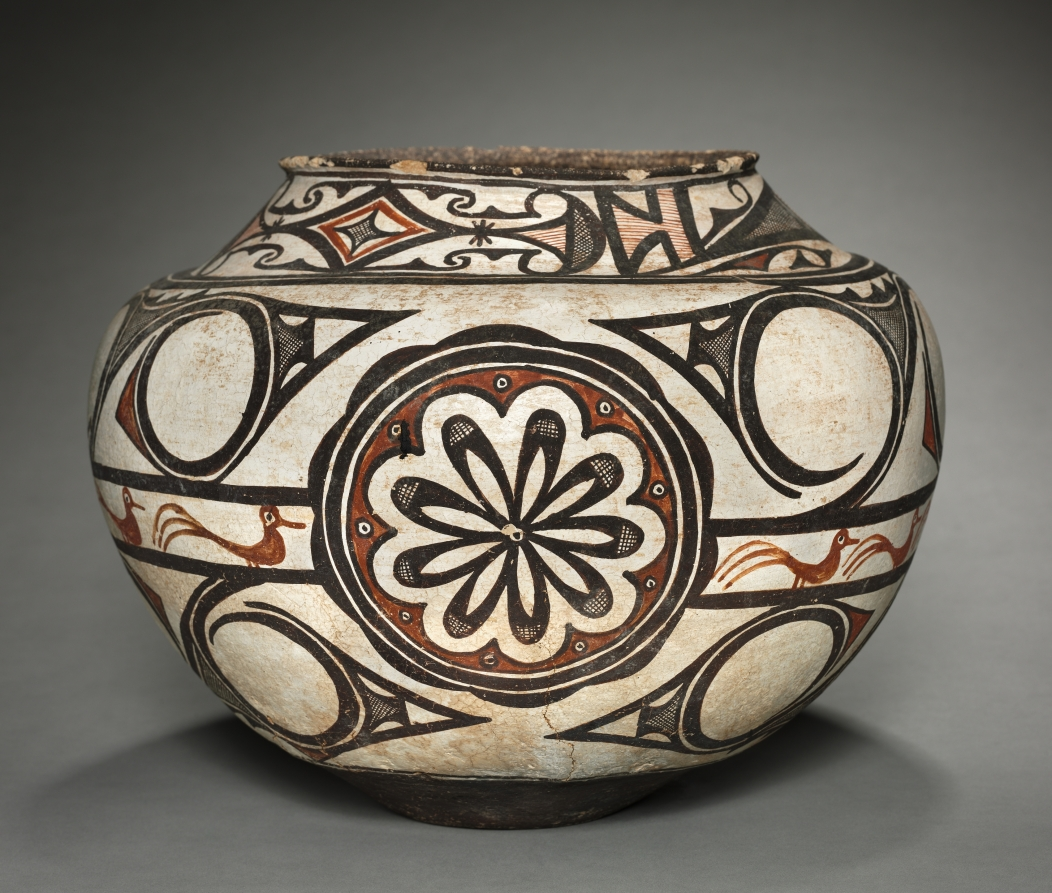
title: Water Jar (Olla) with Rosettes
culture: Native North America, Southwest, New Mexico, Zuni (A:shiwi) Pueblo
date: 1880s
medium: ceramic, slip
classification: Ceramic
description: In the past, motifs painted on Zuni (A:shiwi) ceramics likely held symbolic meanings but, if so, they are largely lost to memory—or at least the Zuni do not discuss them today. Where known, they seem to concern water, verdant crops, and abundant wildlife, also the focus of much Pueblo religious life. For instance, the large, triangular, blade-like forms around this vessel’s neck may represent the thunder knife used in many ceremonies. The petaled forms in circular rosettes refer to sunflowers.